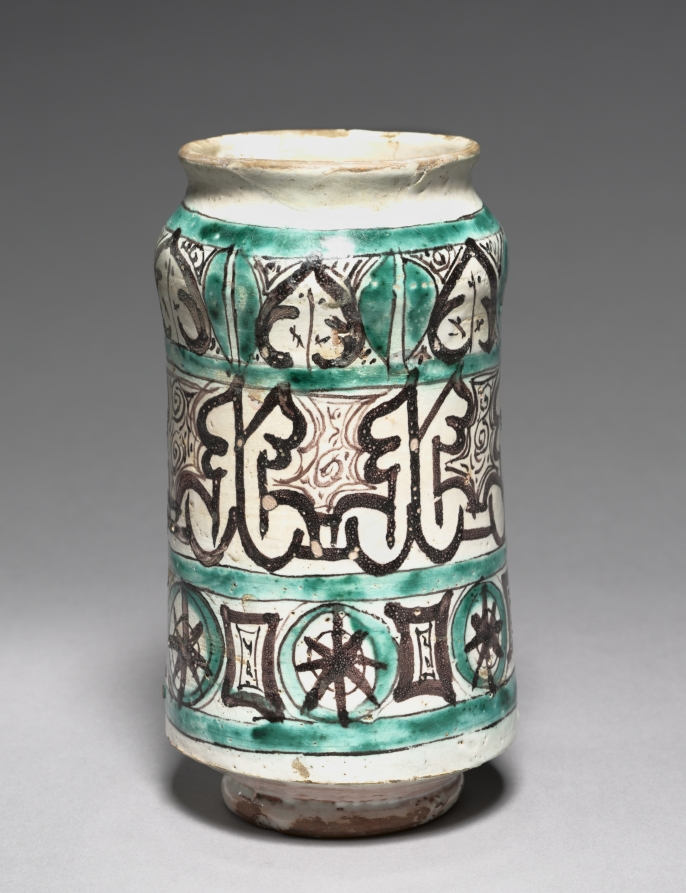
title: Albarello with Pseudo-Kufic Letters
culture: Spain, Paterna, 14th century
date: 1300s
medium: tin-glazed earthenware (maiolica)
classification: Ceramic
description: The Muslim occupation of Spain brought the arts and skills of the Islamic world to Europe and led to the flowering of ceramics throughout the continent. This vessel was made in Paterna, near the Christian port of Valencia. Its design and decoration, featuring a band of pseudo-Kufic (fake Arabic) letters, suggests a strong Muslim influence. The subtle blend of the Islamic and Spanish known as Hispano-Moresque.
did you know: Jars with this cylindrical shape were often used to store spices and herbs as well as pigments. The script on this jar doesn't help in determining its original contents; the text-like lines are completely decorative.